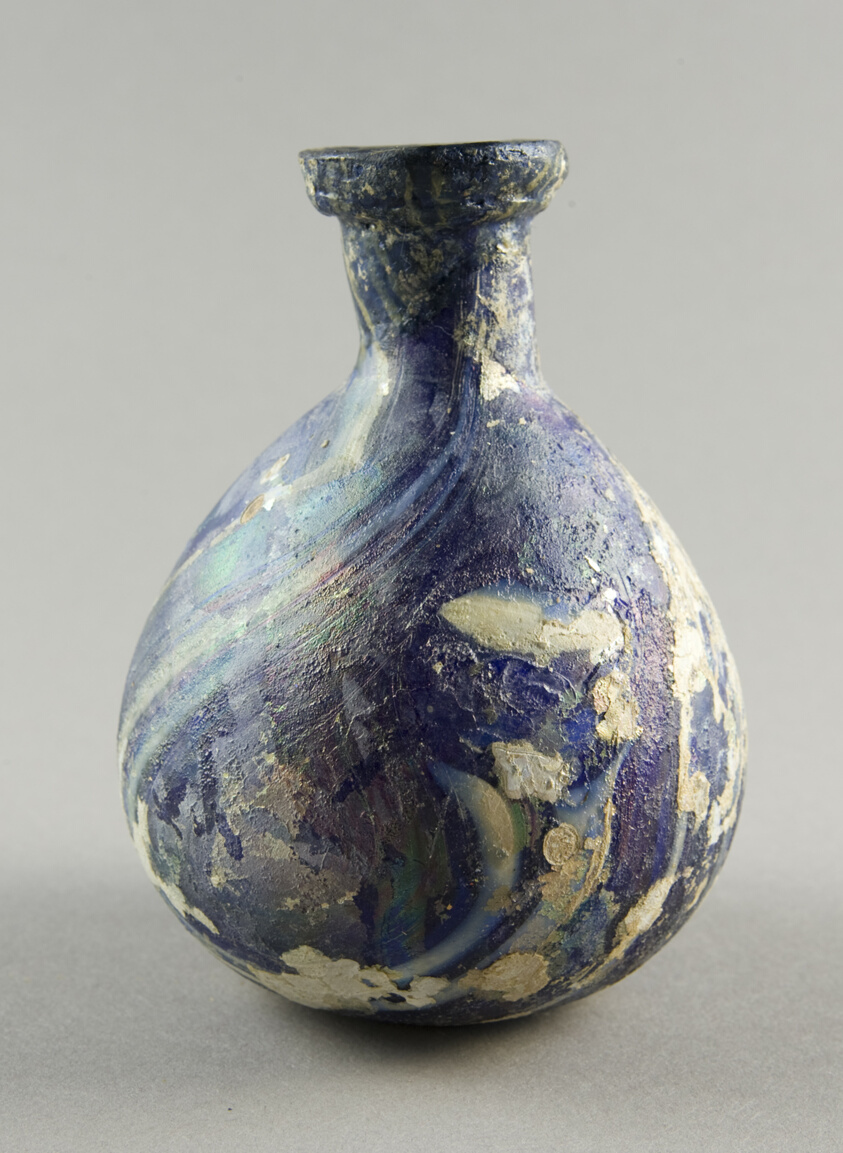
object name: Vessel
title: Bottle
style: syrian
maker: Roman; Levant or Syria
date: 1st century BCE-1st century CE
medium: Glass, blown technique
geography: Syria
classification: bottle; glass; vessel; ancient art